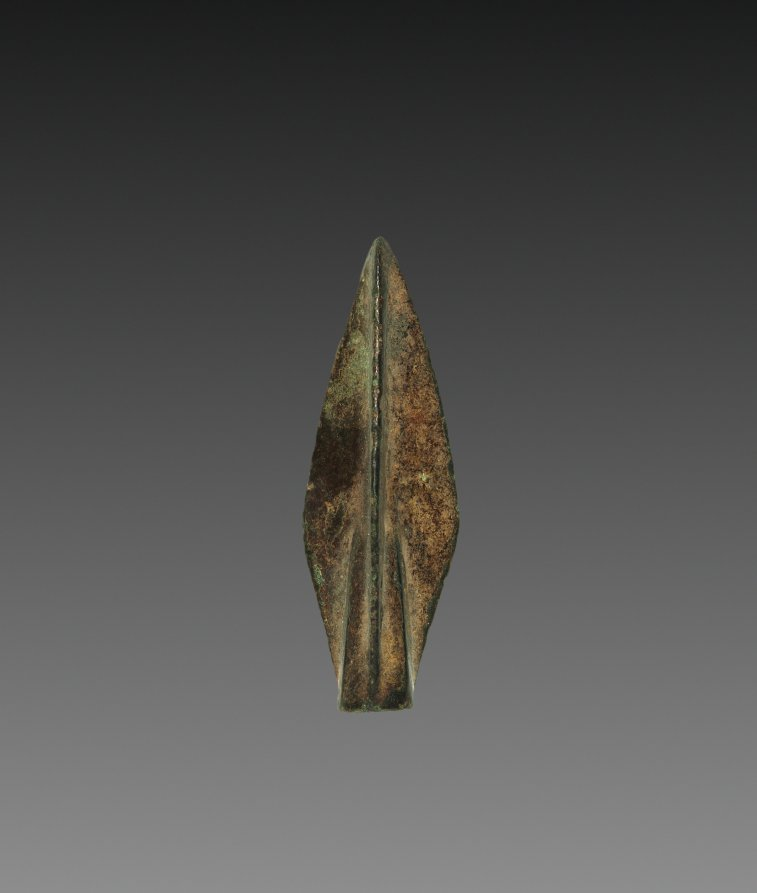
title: Arrow Point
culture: Iran, Ecbatana (?)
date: 550–330 BCE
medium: bronze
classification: Metalwork